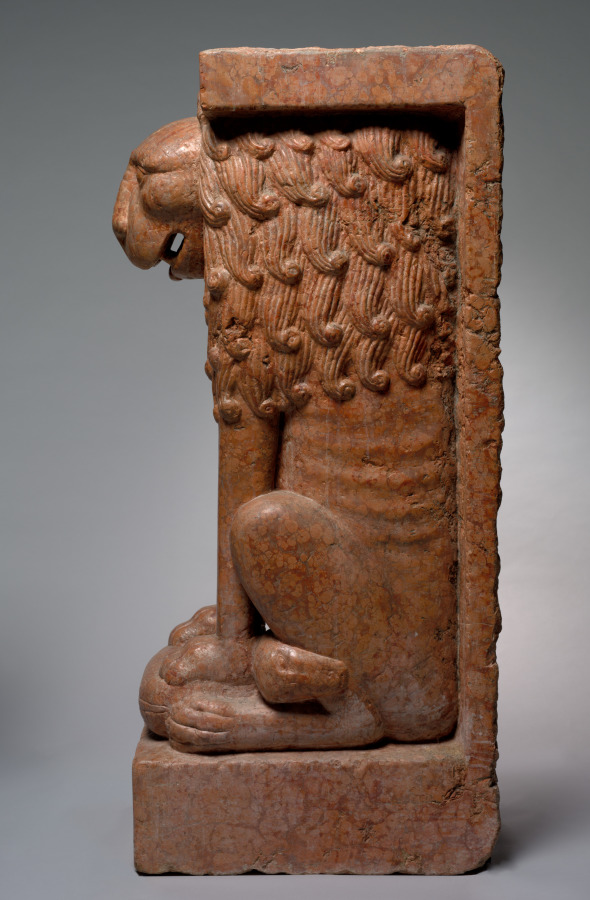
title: Supporting Lion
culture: Italy, style of the 13th century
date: style of the 1200s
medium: pink limestone (known as "Verona Marble")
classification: Sculpture